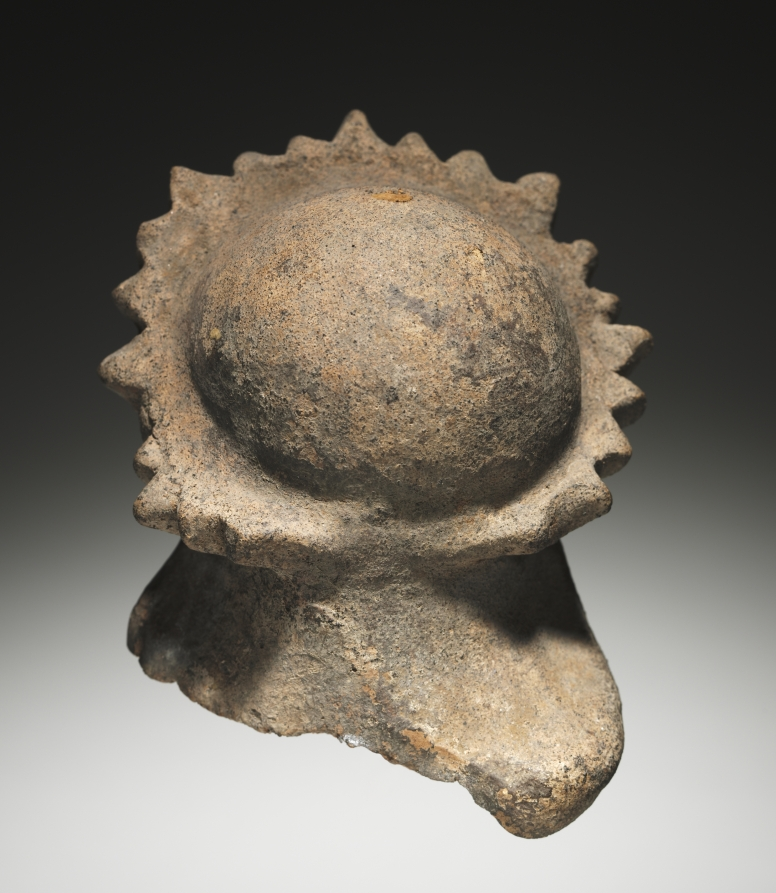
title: Satyr Head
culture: Etruscan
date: 500s BCE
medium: terracotta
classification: Sculpture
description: This head of an equine-eared satyr likely comes from a mold-made terracotta antefix. He has a wide nose, a furrowed brow, and almond-shaped eyes. Traces of pigment remain in the wavy incised beard and lips. A garland, perhaps made of pointed leaves, adorns the hair. It was likely part of a larger Etruscan temple antefix of an intertwined satyr and maenad because of its identical nature to other satyr heads from complete antefixes.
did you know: Satyrs are nature spirits and followers of the wine god Dionysos.